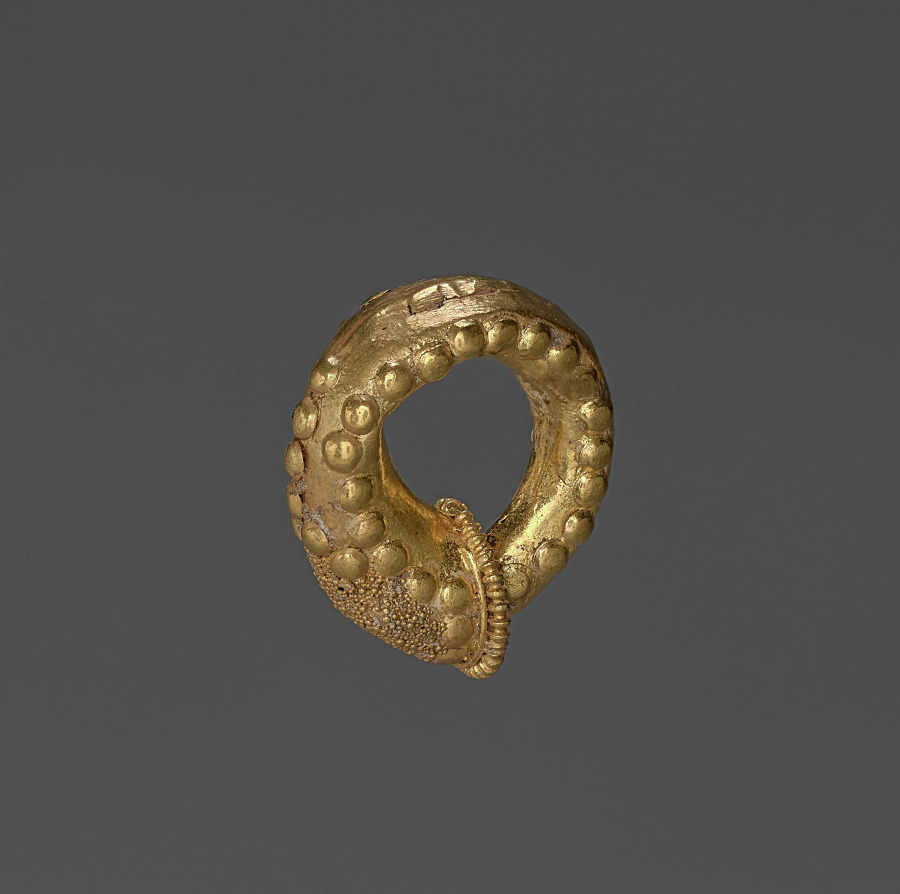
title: Earring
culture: Etruscan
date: 300s BCE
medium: gold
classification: Jewelry